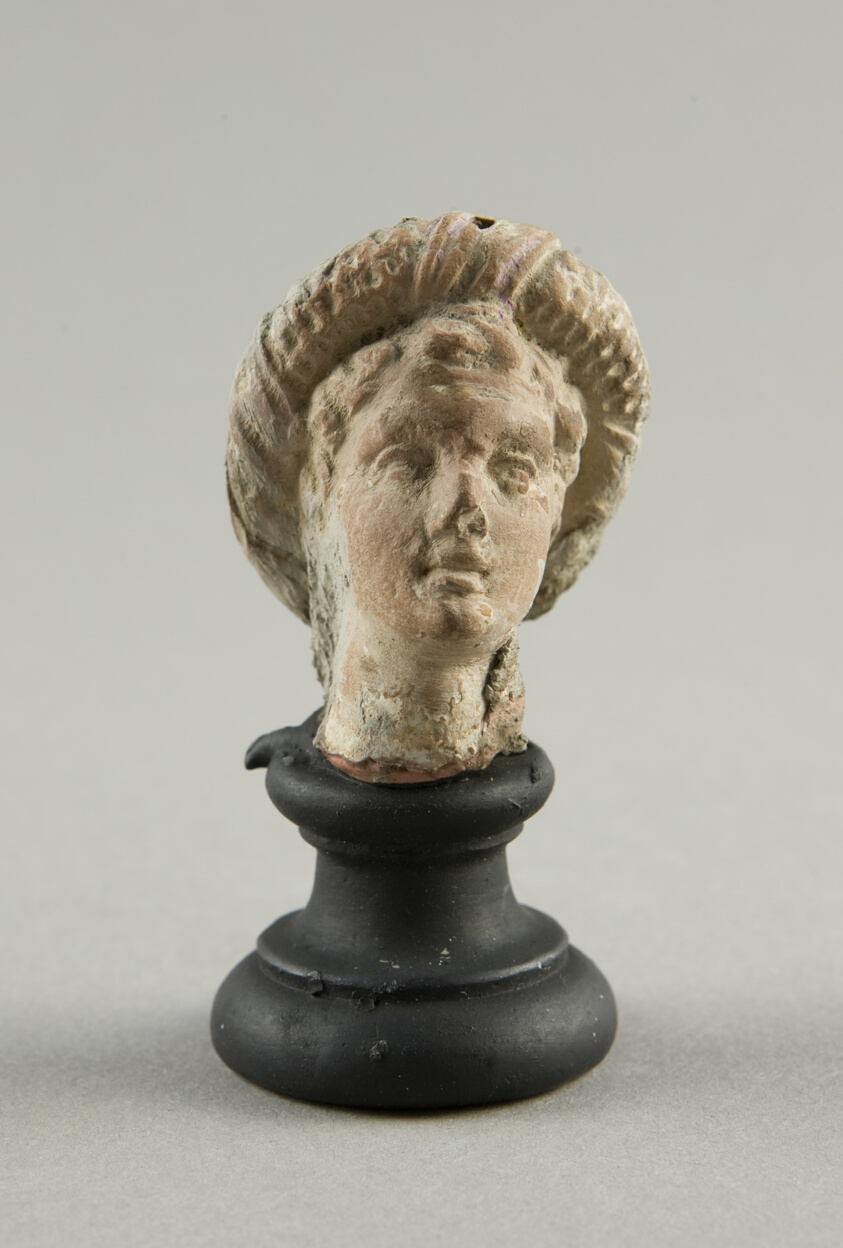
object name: Sculpture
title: Head of a Youth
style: greek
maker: Greek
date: 3rd-2nd century BCE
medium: terracotta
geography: Greece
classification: earthenware; ceramics; sculpture; ancient art